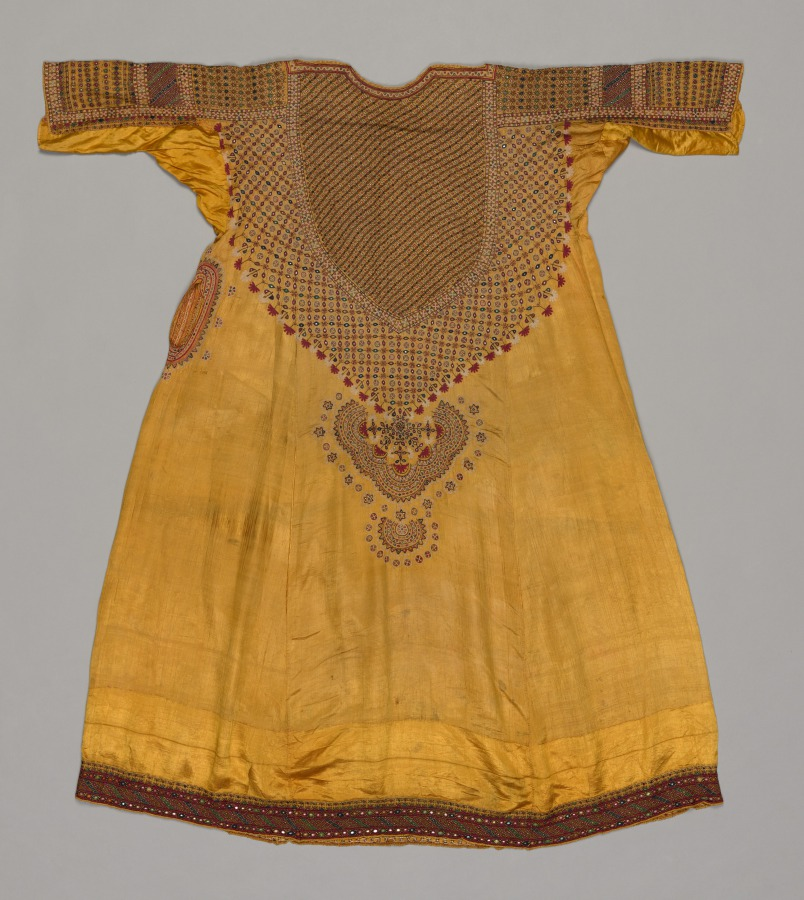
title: Woman's Costume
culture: Western India, Gujarat, Kachchh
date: 1800s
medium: embroidery, silk, embroidery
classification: Garment